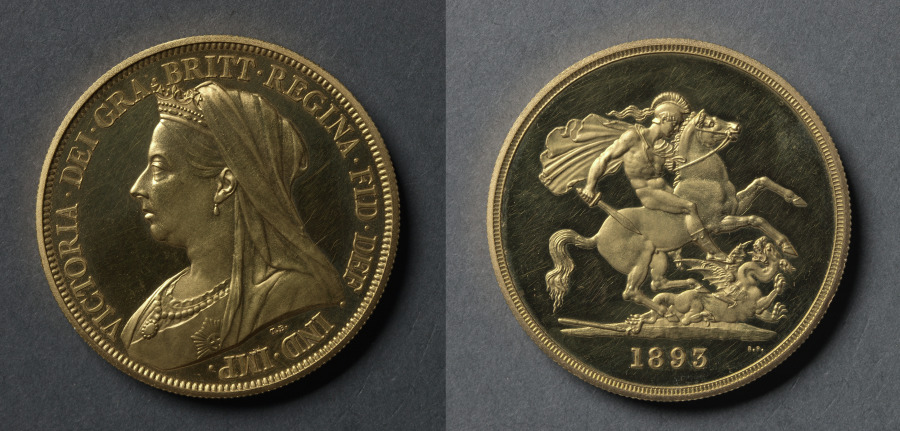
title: Five Pound Piece: Victoria (obverse); St. George and the Dragon (reverse)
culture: England, Victoria, 1837-1901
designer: after Benedetto Pistrucci (Italian, 1784–1855)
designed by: Thomas Brock (British, 1847–1922)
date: 1893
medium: gold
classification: Coins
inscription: VICTORIA . DEI . GRA . BRITT . REGINA . FID . DEF . IND . IMP .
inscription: 1893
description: After the minor storm of dislike which blew up over the 1887 Jubilee design, Thomas Brock, R.A., designed a new obverse, usually known as the "old head" type.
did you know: This coin was not for circulation and only appeared in proof sets.